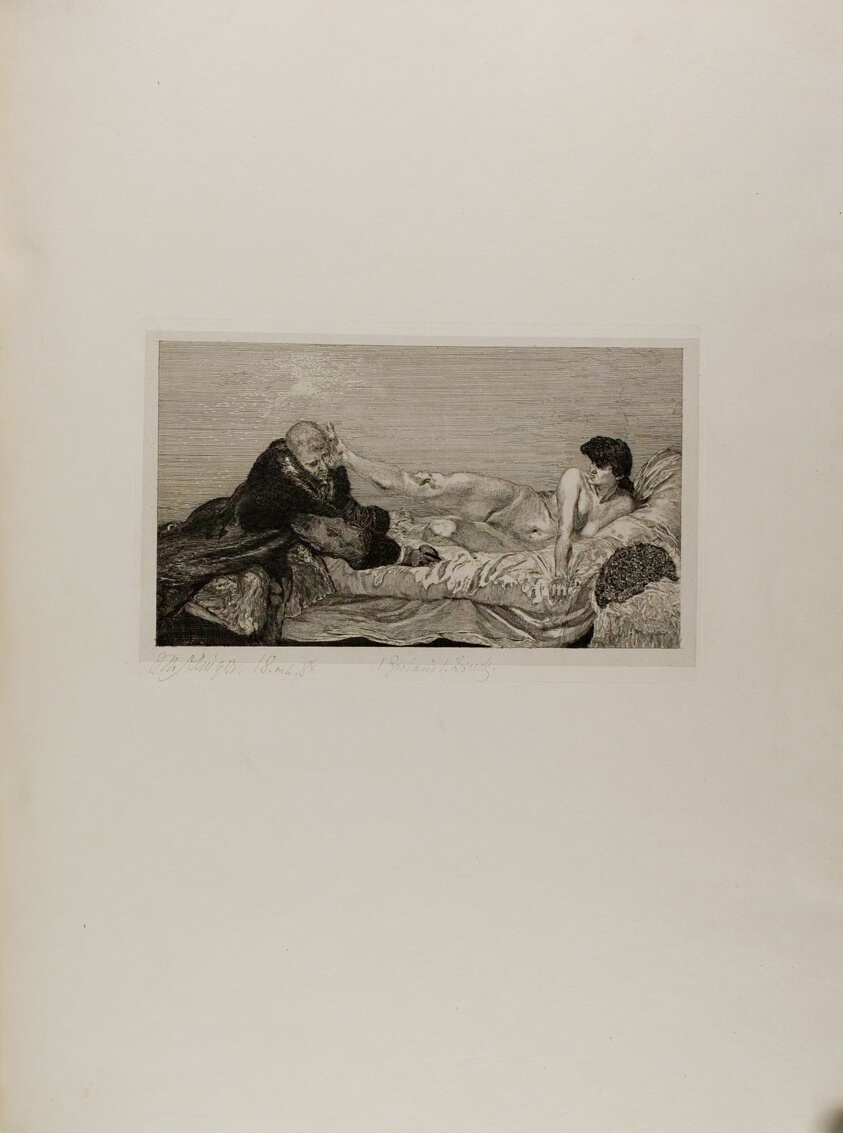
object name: Print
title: The Proposition, plate six from A Life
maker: Max Klinger (German, 1857-1920); printed by Otto Felsing (German, 19th century)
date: 1884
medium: Etching on ivory China paper, laid down on cream laid paper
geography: Germany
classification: etching; print; prints and drawing